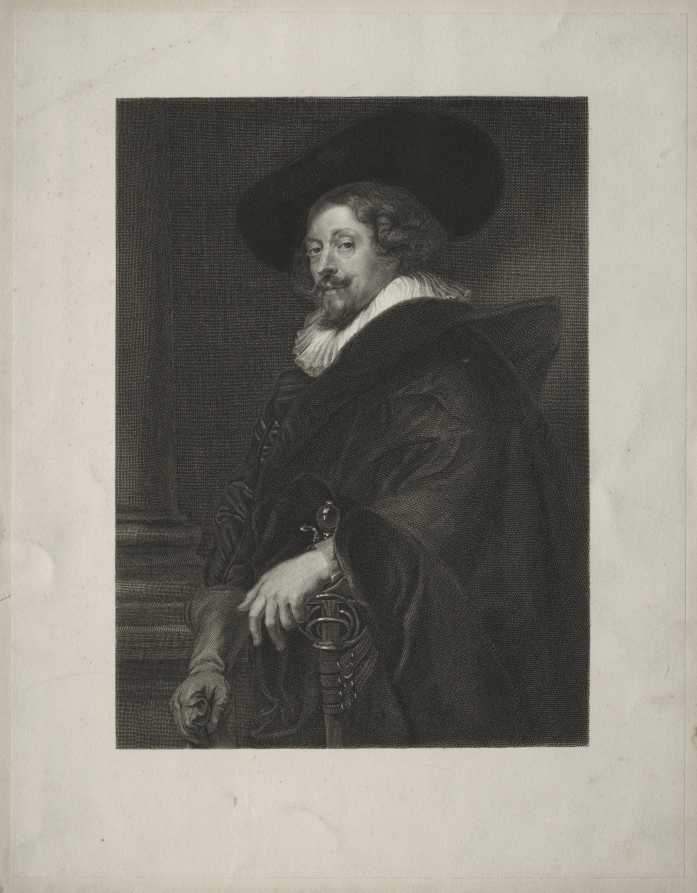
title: Portrait of a Man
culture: Germany, 19th century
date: 1800s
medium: engraving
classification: Print